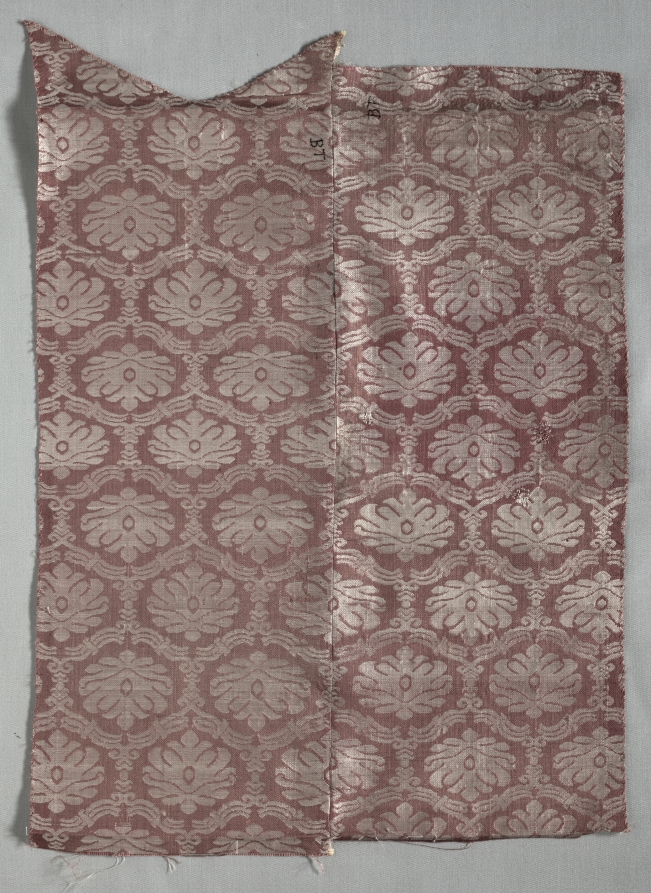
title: Textile Fragment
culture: Italy, 17th century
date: 1600s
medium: damask, silk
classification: Textile